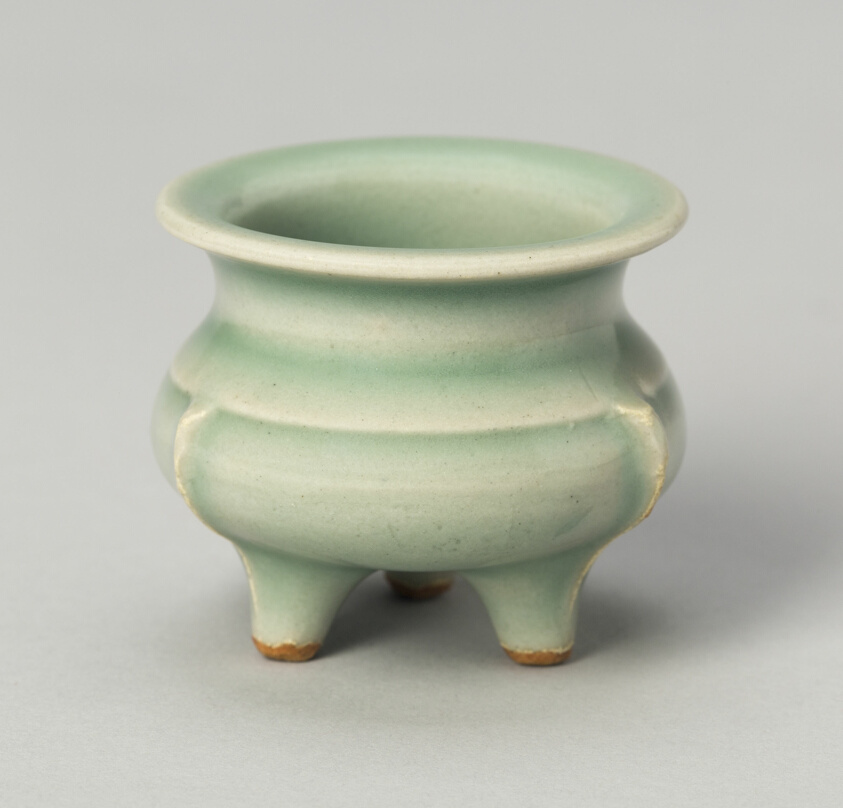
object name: Vessel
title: Tripod Incense Burner (Censer)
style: Chinese (culture or style)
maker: China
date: Southern Song dynasty (1127–1279)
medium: Longquan ware; glazed stoneware with molded decoration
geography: China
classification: ceramics; vessel